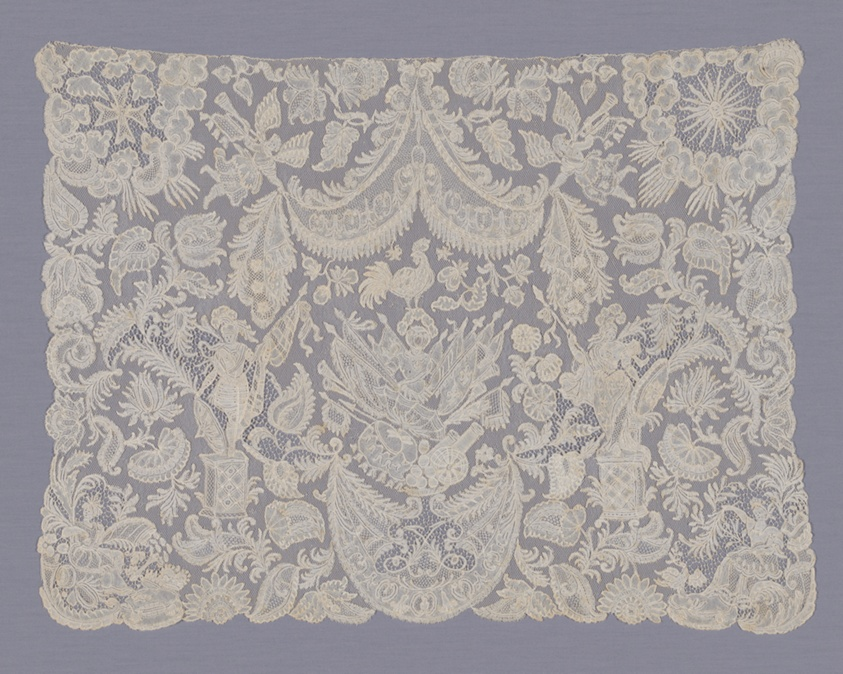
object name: Costume and Accessories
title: Cravat End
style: louis xiv, 18th Century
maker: Flanders, Brussels (present day Belgium)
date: 1700-50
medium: Linen, bobbin part-lace of a type known as "Brussels" with a Droschel mesh ground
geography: Flanders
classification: textile; lace - bobbin; lace; costume - lace; costume accessory; costume accessory worn above the waist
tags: figures (representations), fashion, animals, birds, flowers, floral motifs, plant-derived motif, suns, cannons, soldiers, fabric, sun, woman, roosters, armor, drums